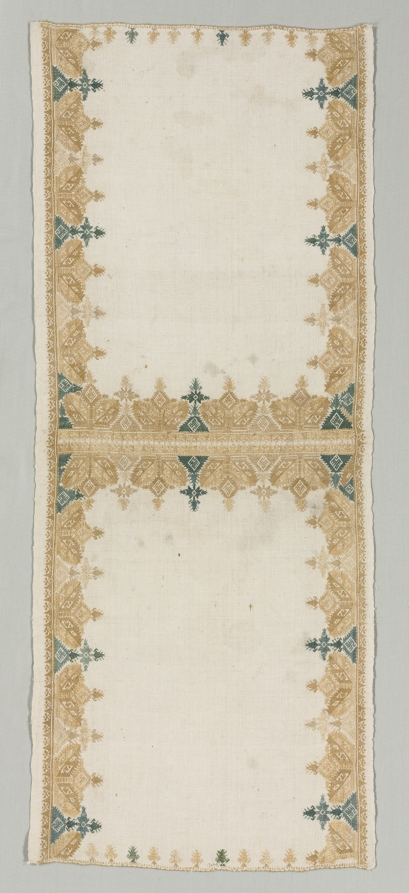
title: Pillow Cover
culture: Greece, Cyclades Islands, Amorgos, 18th century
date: 1700s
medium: embroidery; silk and gold filé on linen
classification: Embroidery